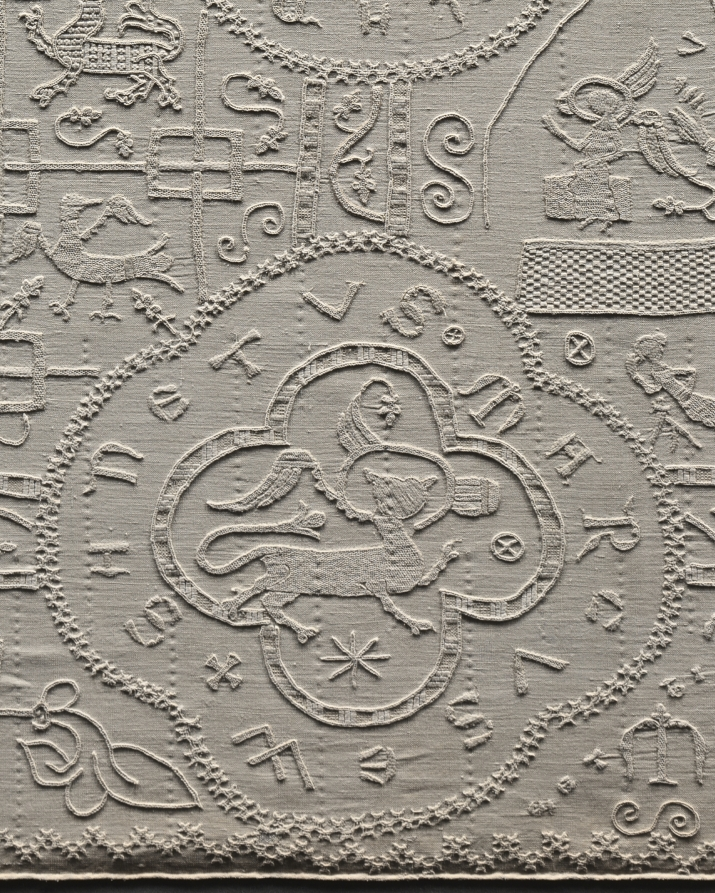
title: Altar Cloth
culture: Germany, Altenberg on the Lahn, Premonstratensian Convent, 14th century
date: c. 1350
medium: embroidery: linen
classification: Embroidery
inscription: various motifs enclosed in quatrefoils with identifying inscriptions in Gothic letters.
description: This large, embroidered altar cloth is one of the rarest, most important medieval church furnishings in existence. It was stitched by nuns in the Premonstratensian Convent in Altenberg on the Lahn River, north of Frankfurt, Germany, and was used to cover the church’s high altar in the weeks leading up to Easter. The cloth is an example of linen embroidery, a specialty of German nuns in the later Middle Ages. The Altenberg monastery church once had valuable furnishings; the high altar retable (a decorated frame with sculptures and paintings on the top of an altar) has survived, the main parts of which are now in the Städel Museum in Frankfurt, Germany.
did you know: When lit from behind, the previously hidden details emerge and the complex design becomes evident.